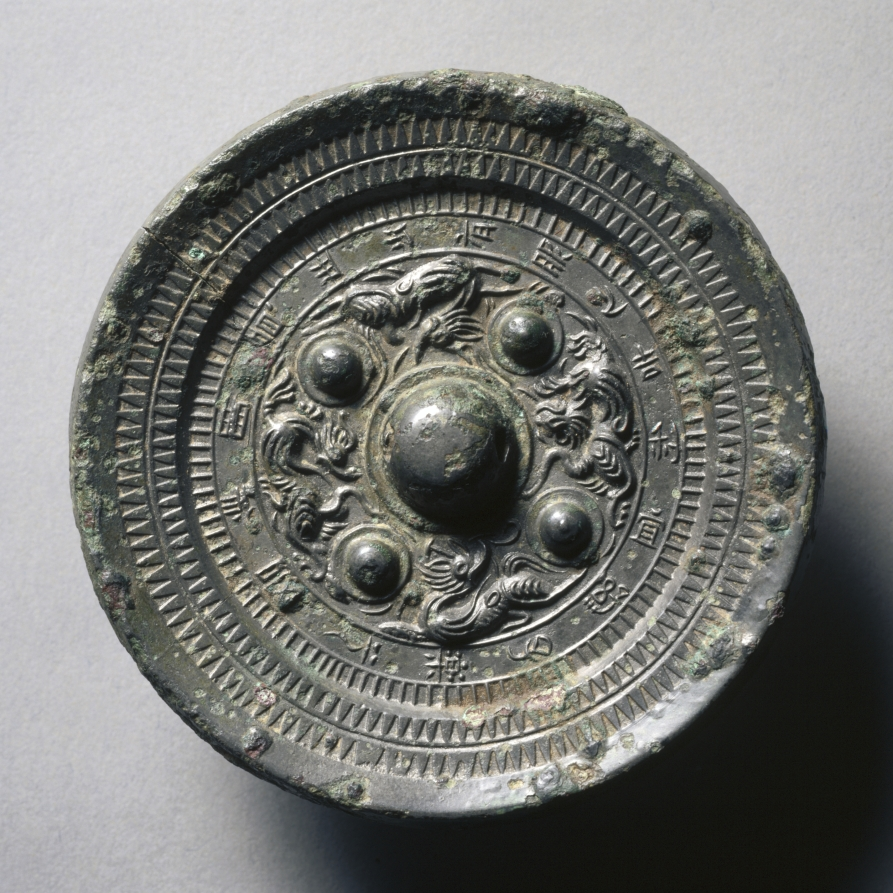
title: Mirror with Four Qilin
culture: China, Eastern Han dynasty (25–220 CE)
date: early 100s–early 200s CE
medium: bronze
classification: Metalwork